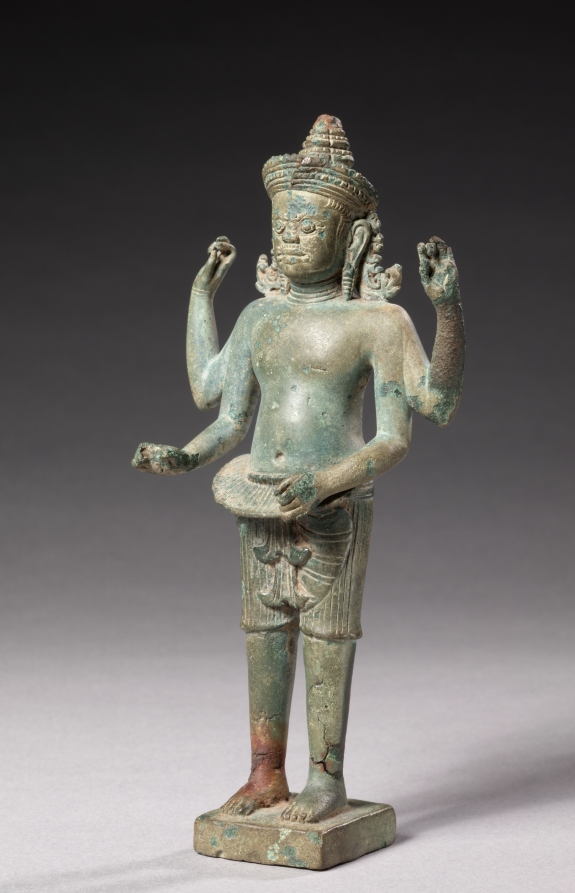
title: Standing Ashura with Four Arms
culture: Cambodia, Koh Ker style, 2nd quarter of 10th Century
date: 925–950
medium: bronze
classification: Sculpture